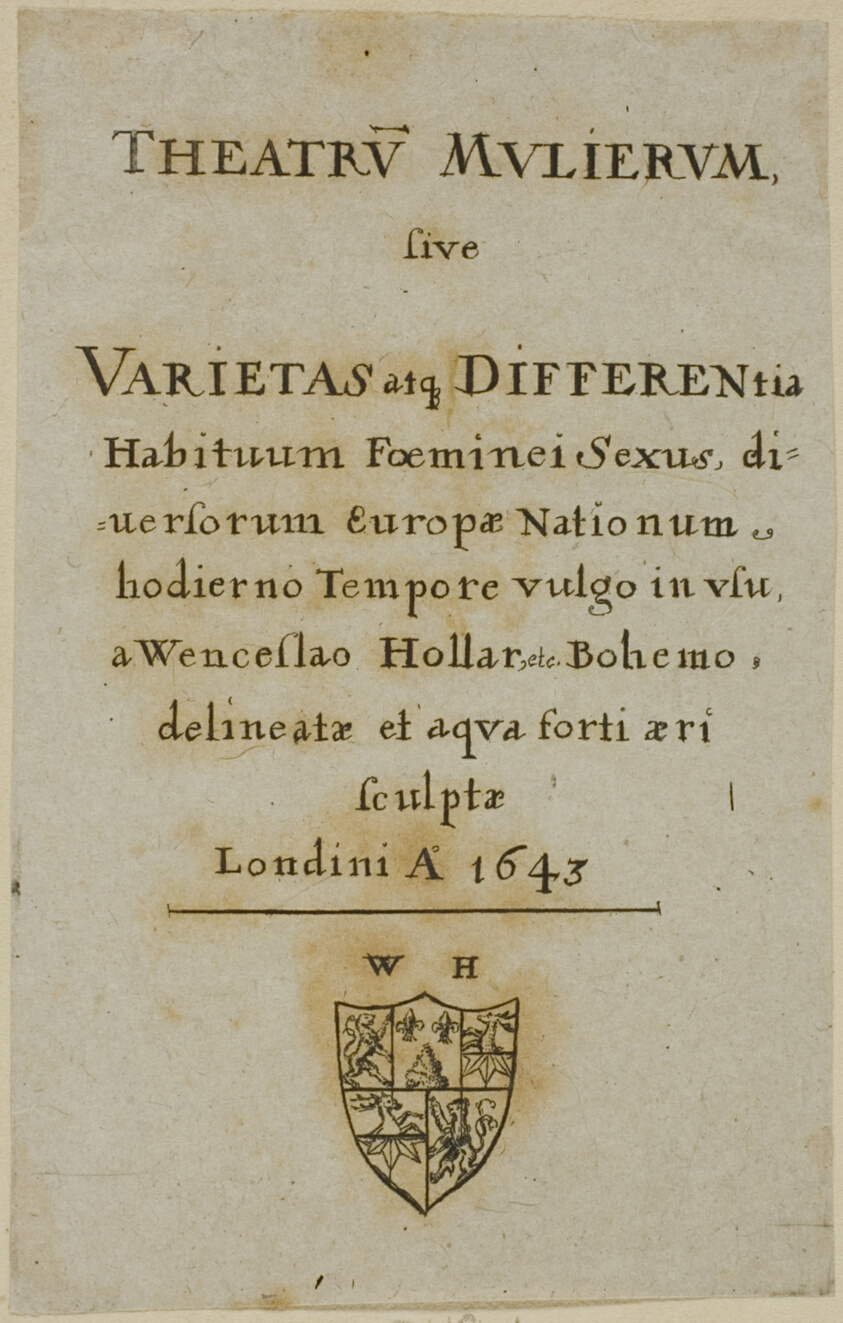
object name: Print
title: Title Page to Theatrum Mulierum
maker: Wenceslaus Hollar (Bohemian, 1607-1677)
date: 1643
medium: Etching on gray Asian paper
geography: Bohemia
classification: etching; print; prints and drawing